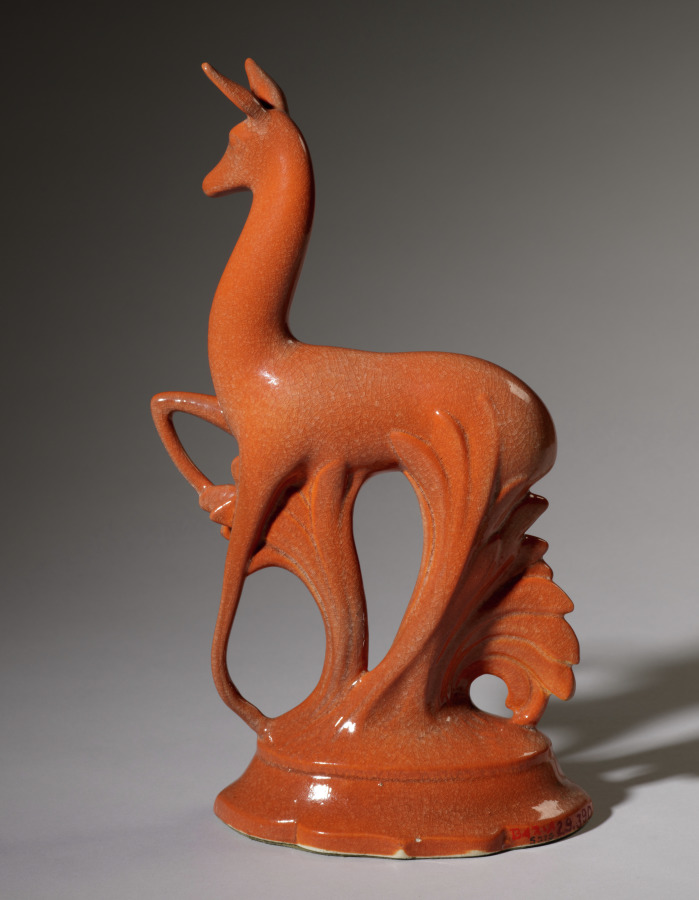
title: Fawn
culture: America, Ohio, Cleveland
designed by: Waylande Gregory (American, 1905–1971)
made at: Cowan Pottery Studio (America, Ohio, Rocky River, 1920–1931)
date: 1929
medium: earthenware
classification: Ceramic